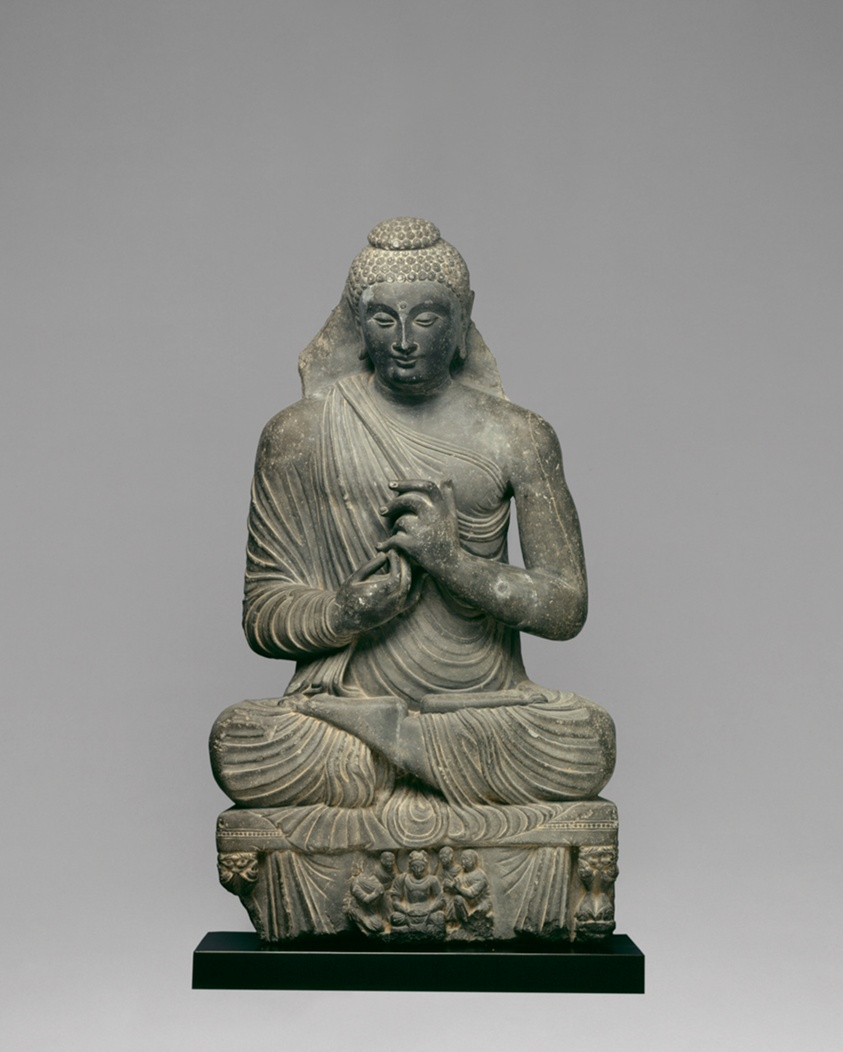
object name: Sculpture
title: Seated Buddha with Hands in Preaching Gesture (dharmachakrapravartanamudra)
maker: Pakistan; Ancient region of Gandhara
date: Kushan period, 2nd/3rd century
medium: Schist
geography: Gandhara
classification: schist; stone; sculpture; asian art